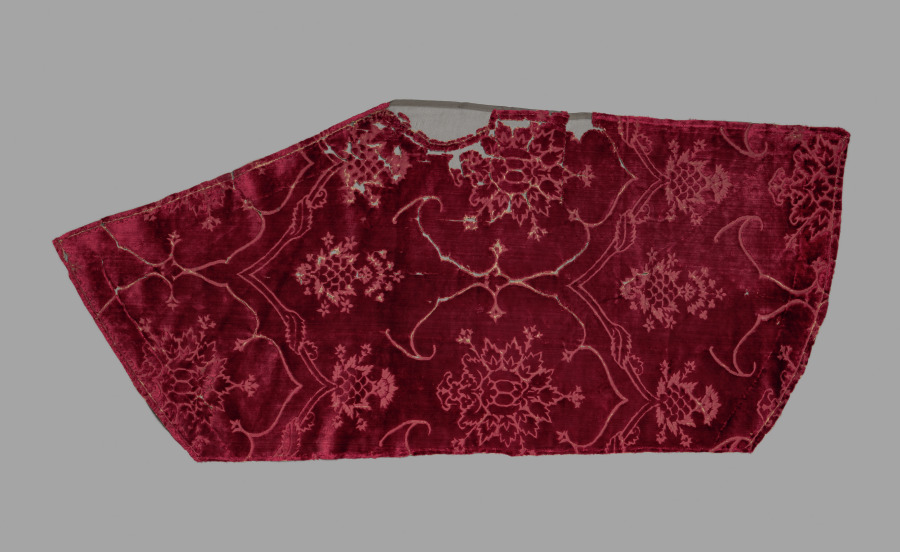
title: Pieces from Disassembled Cape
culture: Italy, 15th century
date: 1400s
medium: velvet (cut and voided); silk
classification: Velvet